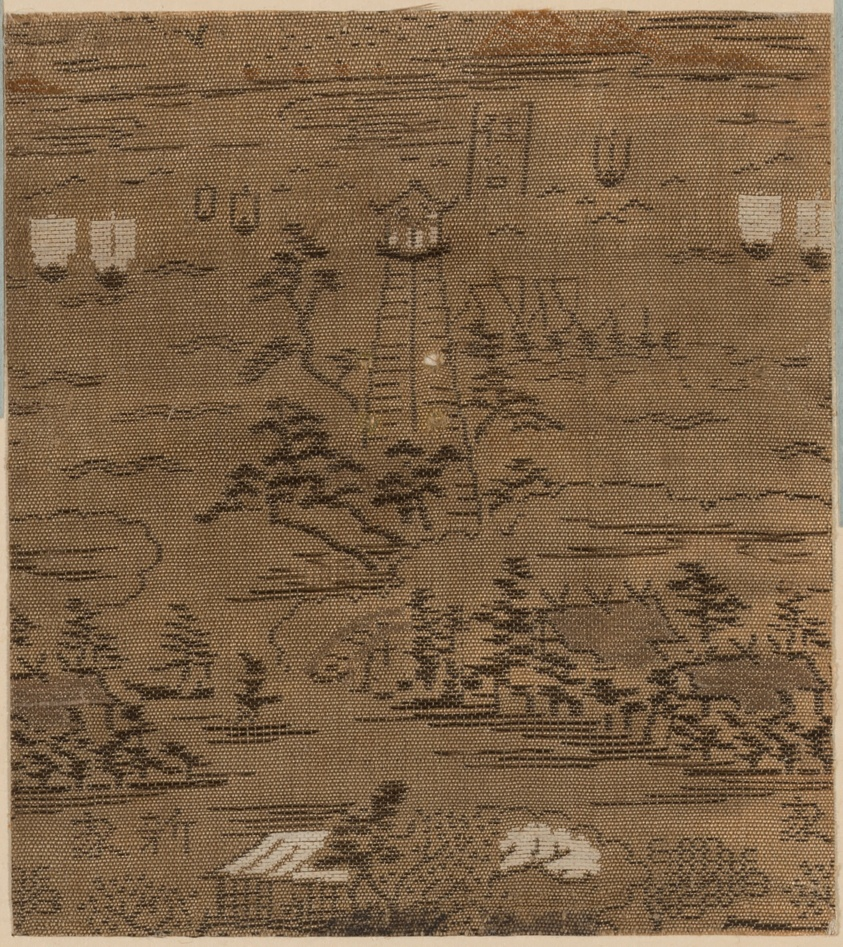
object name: Textile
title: Fragment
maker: Japan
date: Edo period (1615–1868), 1775/1825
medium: Single plain compound cloth, silk.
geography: Japan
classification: textile; weaving